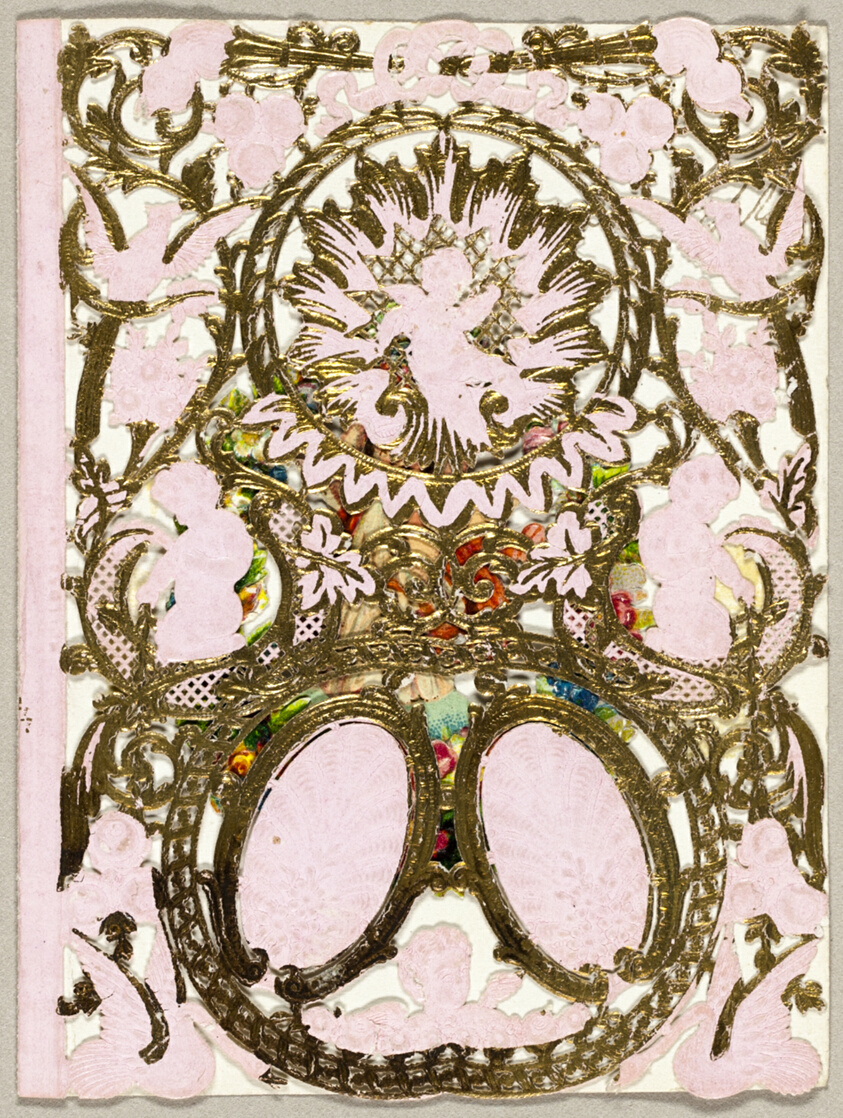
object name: Drawing and Watercolor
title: Untitled Valentine (Putti)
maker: Mullord Brothers (English, 19th century)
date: 1850/59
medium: Gold paint on cut and embossed (designed) pink wove paper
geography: England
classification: collage; valentine; prints and drawing; paper